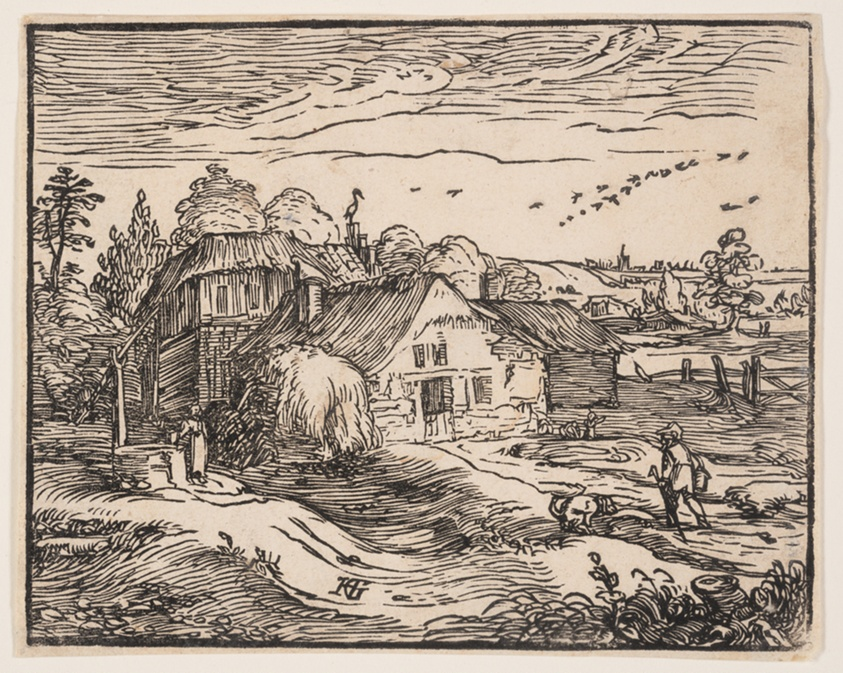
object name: Print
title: Landscape with a Farmhouse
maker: Hendrick Goltzius (Dutch, 1558–1617)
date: c. 1600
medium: Woodcut in black on cream laid paper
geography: Netherlands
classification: woodcut; paper; print; prints and drawing